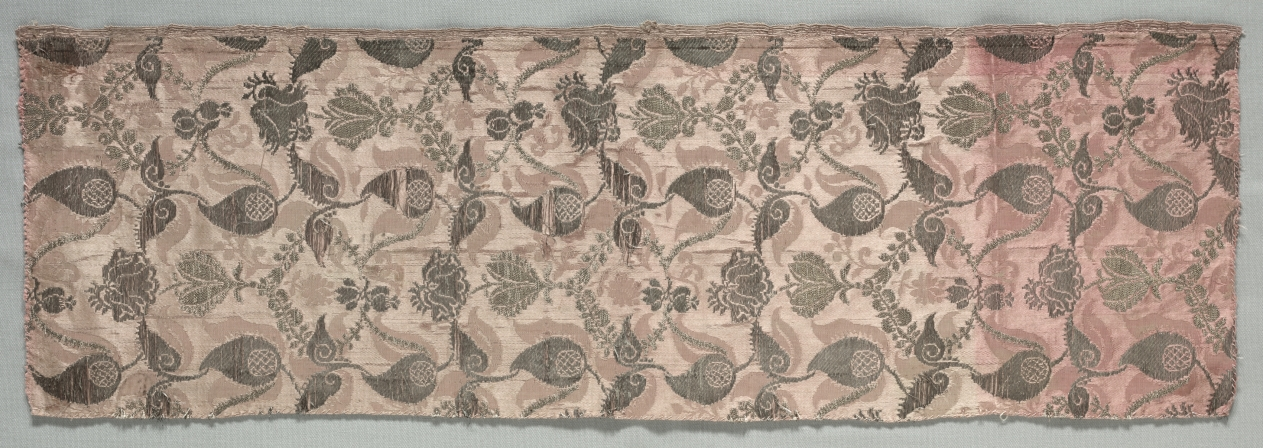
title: Brocade Textile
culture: Italy, Padua and Venice, 16th century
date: 1600s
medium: brocade; silk and metal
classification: Textile